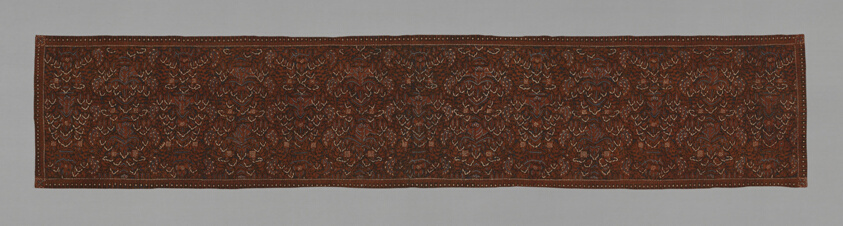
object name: Textile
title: Slendang (Shawl)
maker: Indonesia, Central Java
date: 19th century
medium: Cotton, batik dyed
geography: Java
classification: textile; weaving; costume; dress (garment); clothing